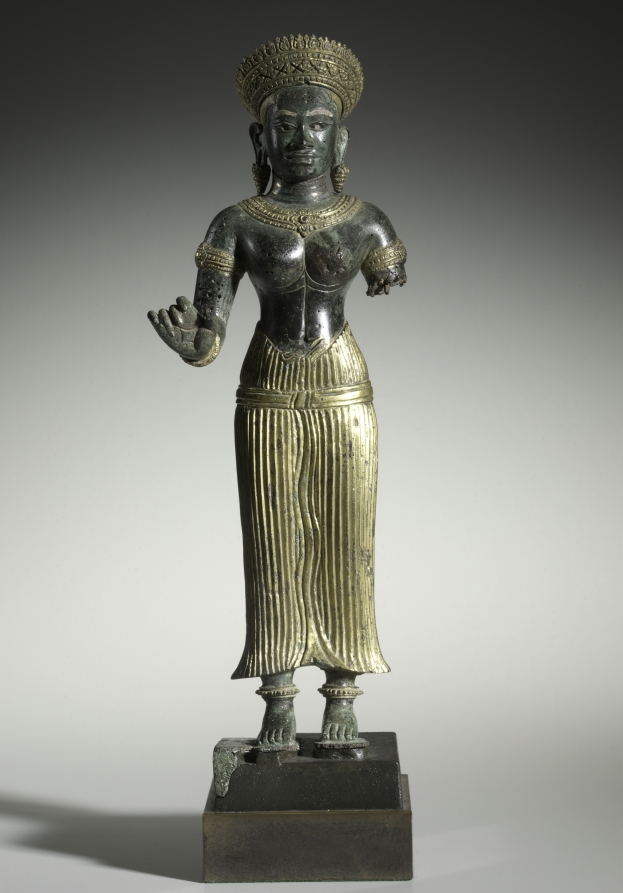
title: Royal Female Figure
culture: Cambodia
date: late 1000s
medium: partially gilt bronze and silver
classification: Sculpture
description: The identity of this figure is uncertain, since the objects she held are missing, and no other related sculptures have been located. Since she has only two arms and wears a crown, she is probably a royal woman. Semiprecious stones or metals, such as onyx or silver, would have been inlaid into her eyes and eyebrows, further enlivening her image. The gilded adornments are set off against her dark shining skin to dazzling effect. Most Cambodian stone sculptures have lost their gold jewelry, so this figure gives an accurate impression of how many would have looked when installed in their sanctuaries.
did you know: This royal female figure's eyebrows and pupils were originally inlaid with silver or semiprecious stones.